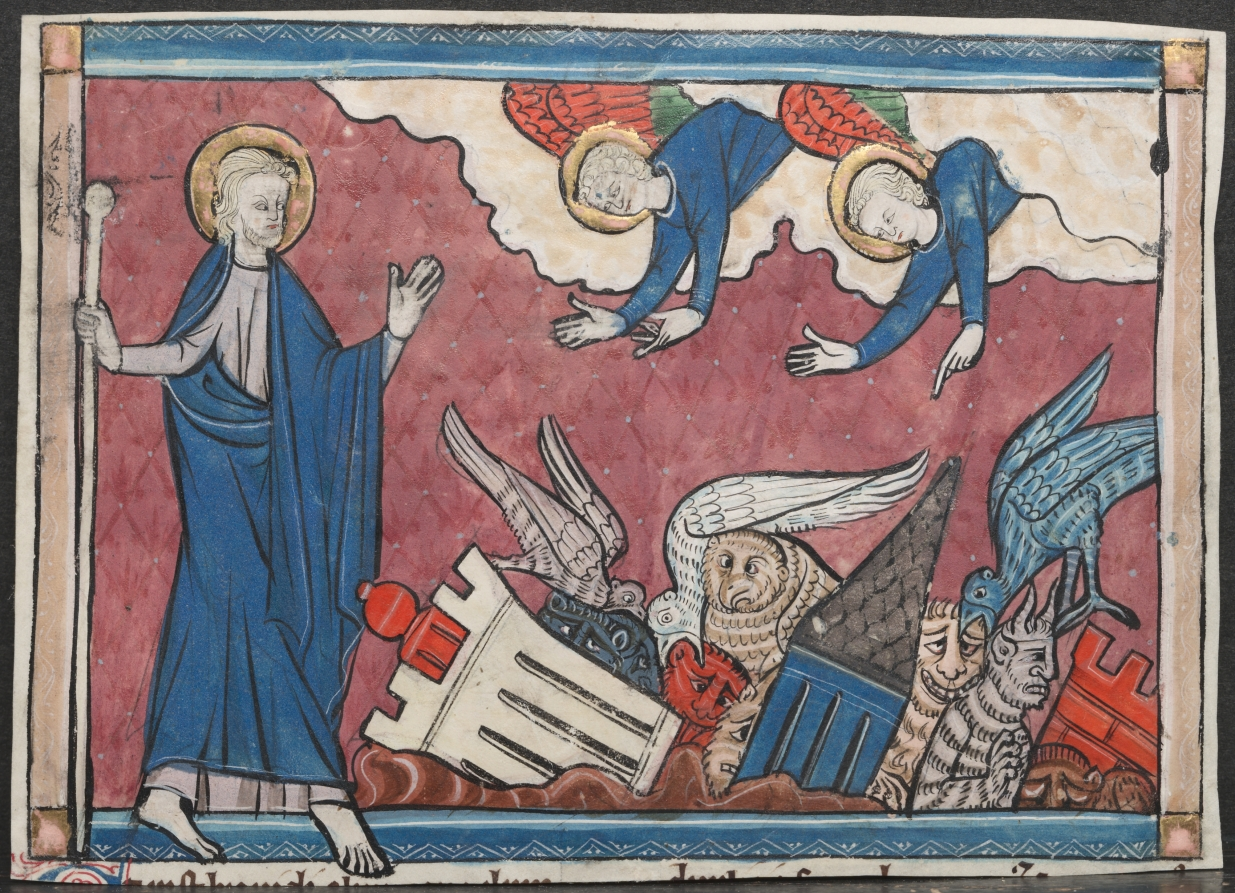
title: Miniature from a Manuscript of the Apocalypse: The Fall of Babylon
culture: France, Lorraine, 13th century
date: c. 1295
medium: ink, tempera, and gold on vellum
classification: Manuscript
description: The visionary text of St. John the Evangelist's Apocalypse, the final book of the New Testament, inspired these images of salvation, sin, and divine retribution. A large number of illustrated volumes of the Apocalypse appeared in Northern Europe, especially in England, after the year 1240--perhaps reflecting a fear of the world's end. These miniatures come from a manuscript produced in Lorraine, then artistically influenced by English models.